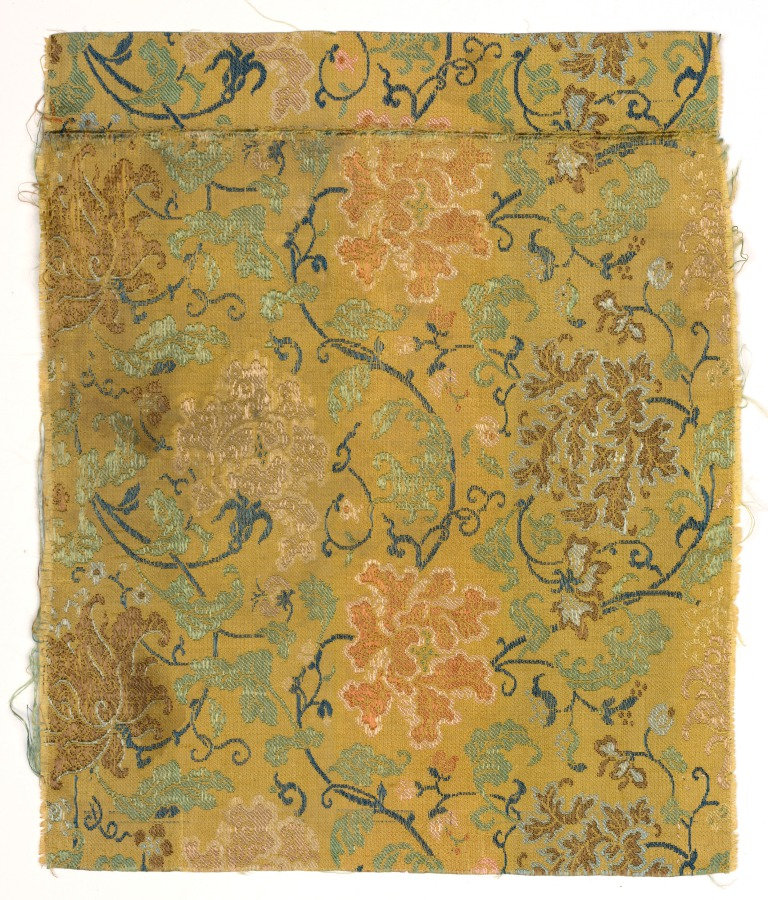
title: Fragment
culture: China, 18th century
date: 1700s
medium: twill ground; silk diasper weave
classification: Textile